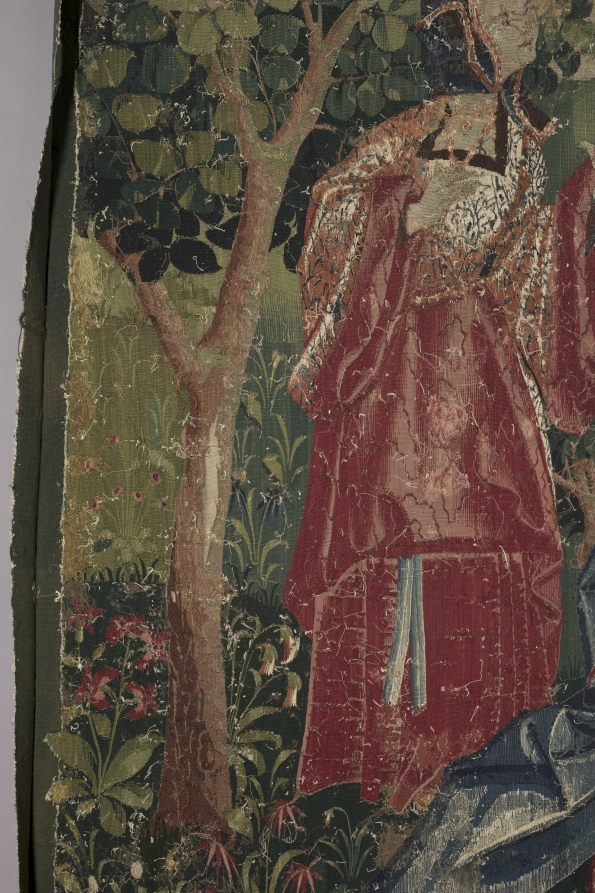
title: Youth (from Chateau de Chaumont set)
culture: France, Lyon(?), early 16th century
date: 1512–15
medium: silk and wool; tapestry weave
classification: Tapestry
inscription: French verse in Gothic letters translates as follows: Youth triumphs while its heart is healthy, And when it seems to hold all in its hand. But this triumph is without eternity. Here one sees the example full well: Those who are happy hide death in thier heart. Let the young heed this warning.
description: Louise of Savoy (1476-1531), queen mother of King Francis I, is depicted here in a sumptuous brocaded velvet in the center. She addresses youthful figures including Éléonore, Pierre Sala’s daughter who is facing her future husband, Hector. On the right, King Louis XII (died 1514) stands in front of the Chateau Langais where he had married Anne of Brittany. Above is Hector’s deceased father with a partially concealed skull under his robe, while a woman expresses surprise at the sight. The verse in Old French at the top states that youthful happiness is not eternal: Youth makes sounds as long as its heart is healthy, And thinks that it holds all in its hand. But this triumph is not eternal. Here you see clearly an example: He that is happy has death in his breast. Of this you people should take note.